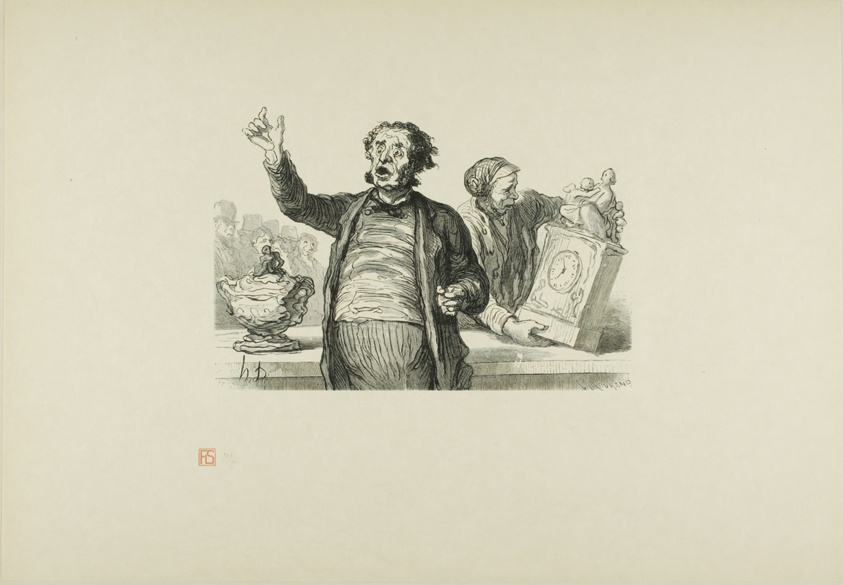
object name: Print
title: The Auction House: The Auctioneer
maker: Charles Maurand (French, 1824-1904); after Honoré Victorin Daumier (French, 1808-1879); printed by François Louis Schmied (Swiss, 1873-1941); published by Jules Meynial (French, 20th century)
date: 1864, printed 1920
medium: Wood engraving on cream Japanese paper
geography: France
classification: wood engraving; print; prints and drawing